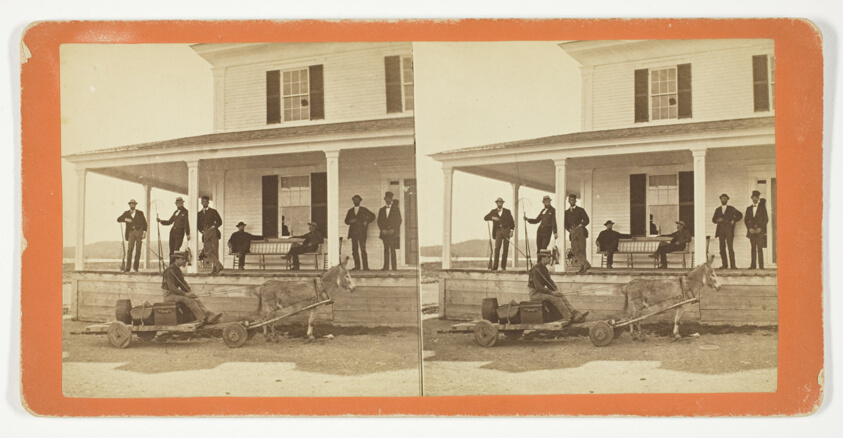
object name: Photograph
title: Untitled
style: 19th century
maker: Artist unknown; American, late 19th century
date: 1875/99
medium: Albumen print, stereo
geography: United States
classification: photography; photograph